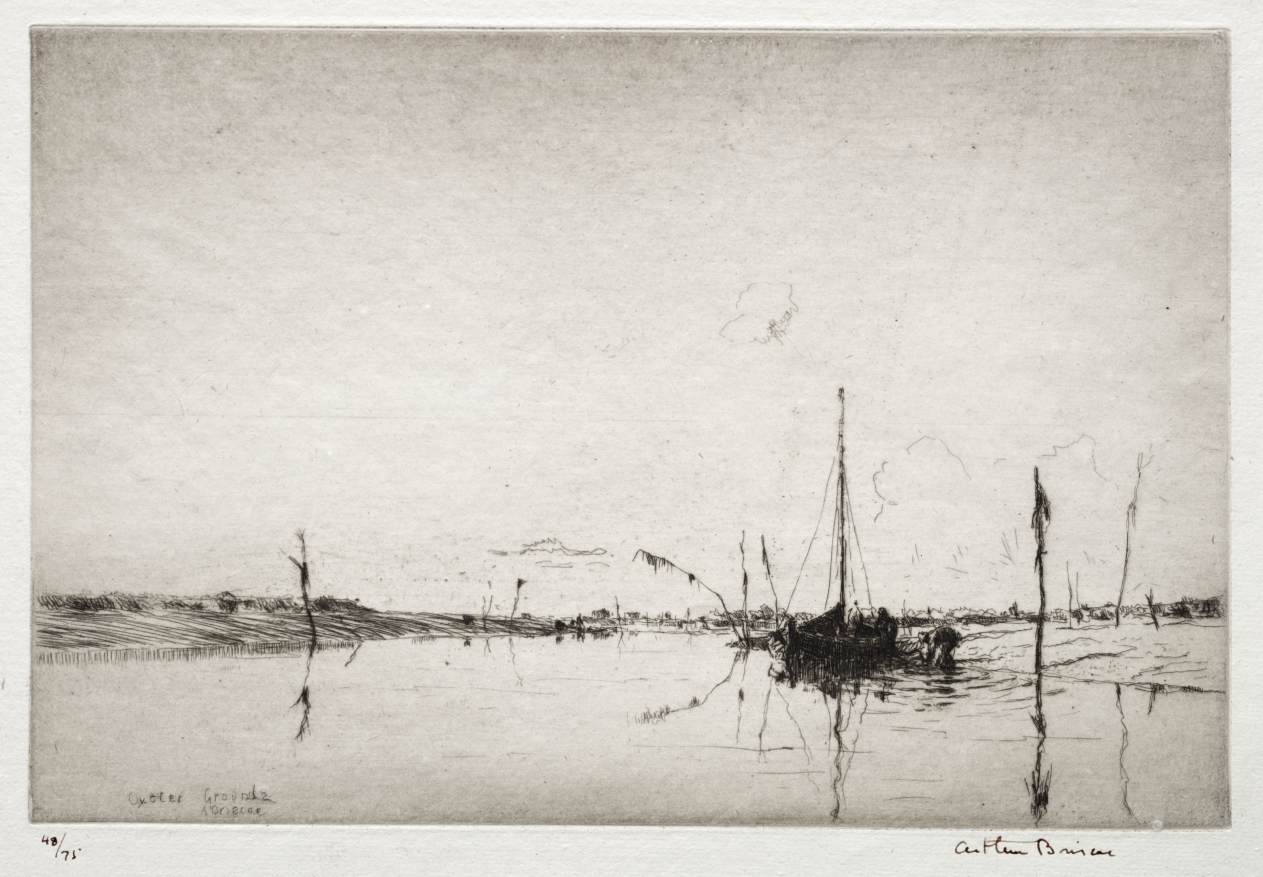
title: Oyster Grounds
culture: England, 20th century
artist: Arthur John Trevor Briscoe (British, 1873–1943)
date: 1925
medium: etching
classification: Print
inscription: Lower margin, in ink: 48/75 Arthur Briscoe